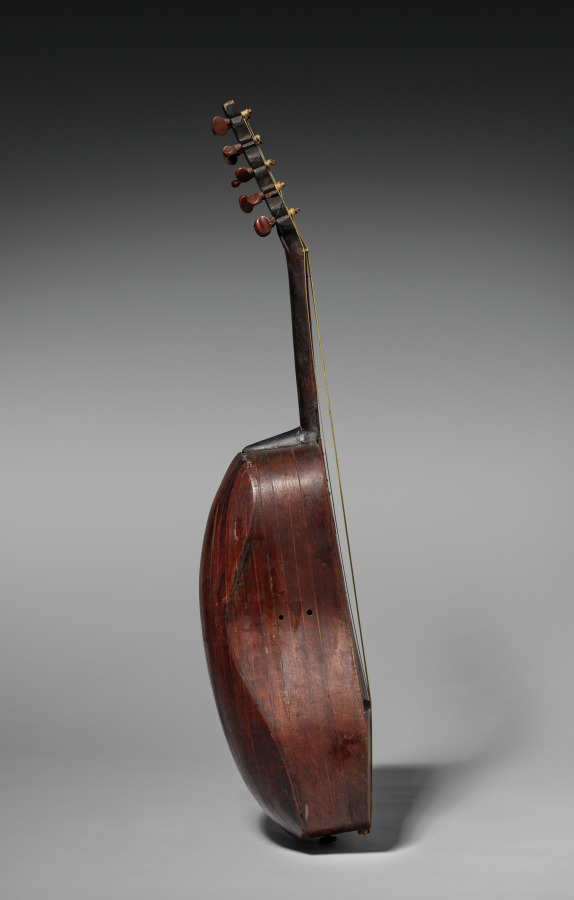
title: Chittara Battente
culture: Italy, 15th century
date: 1400s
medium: wood, paper?, sound hole, bone bridge, sheet metal inlay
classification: Musical Instrument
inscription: bears broken ticket of parchment.